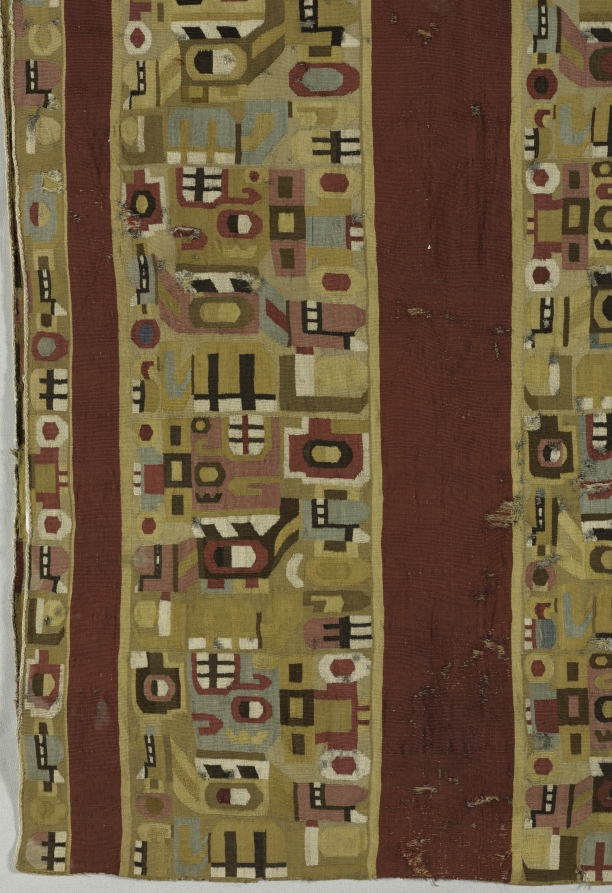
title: Tunic with Sacrificer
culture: South America, Peru, Central Andes, Middle Horizon, Wari people, 7th-11th century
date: 600–1000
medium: camelid-fiber, cotton; tapestry weave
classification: Textile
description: An extremely abstract supernatural sacrifice repeats in different colors and orientations across the body of this tunic, which was shortened on one side in antiquity. Look for the toothy black-and-white mouth in the sacrificer's upward-gazing head; other facial features include a button nose and a vertically divided eye. The figure holds the L-shaped haft of an axe behind its back and, at the front of its body, a short staff with a severed, upside-down human head on the top.